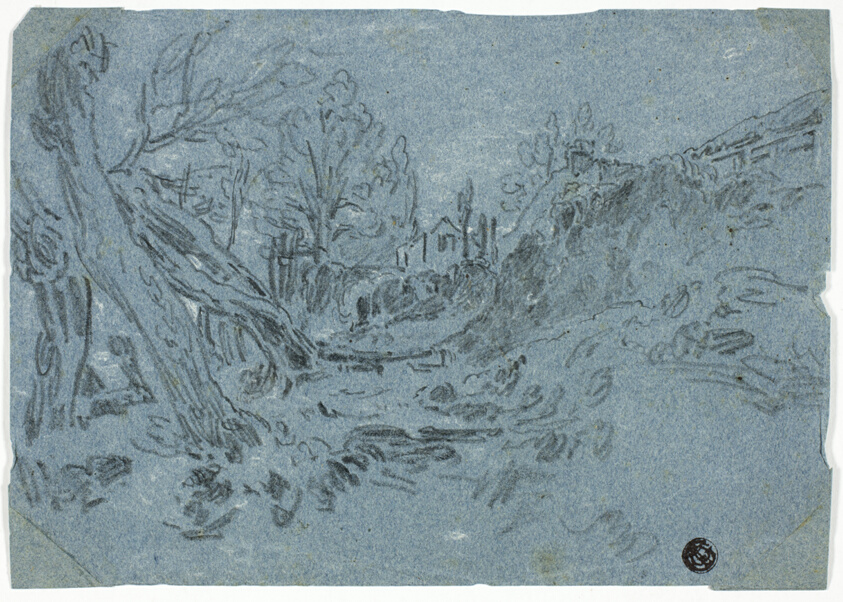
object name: Drawing and Watercolor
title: Ravine with House in Distance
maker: Attributed to William Turner (English, 1789-1862); or John Varley (English, 1778-1842)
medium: Black crayon, heightened with white chalk, on blue wove paper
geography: England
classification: charcoal; crayon; drawings (visual works); prints and drawing; paper